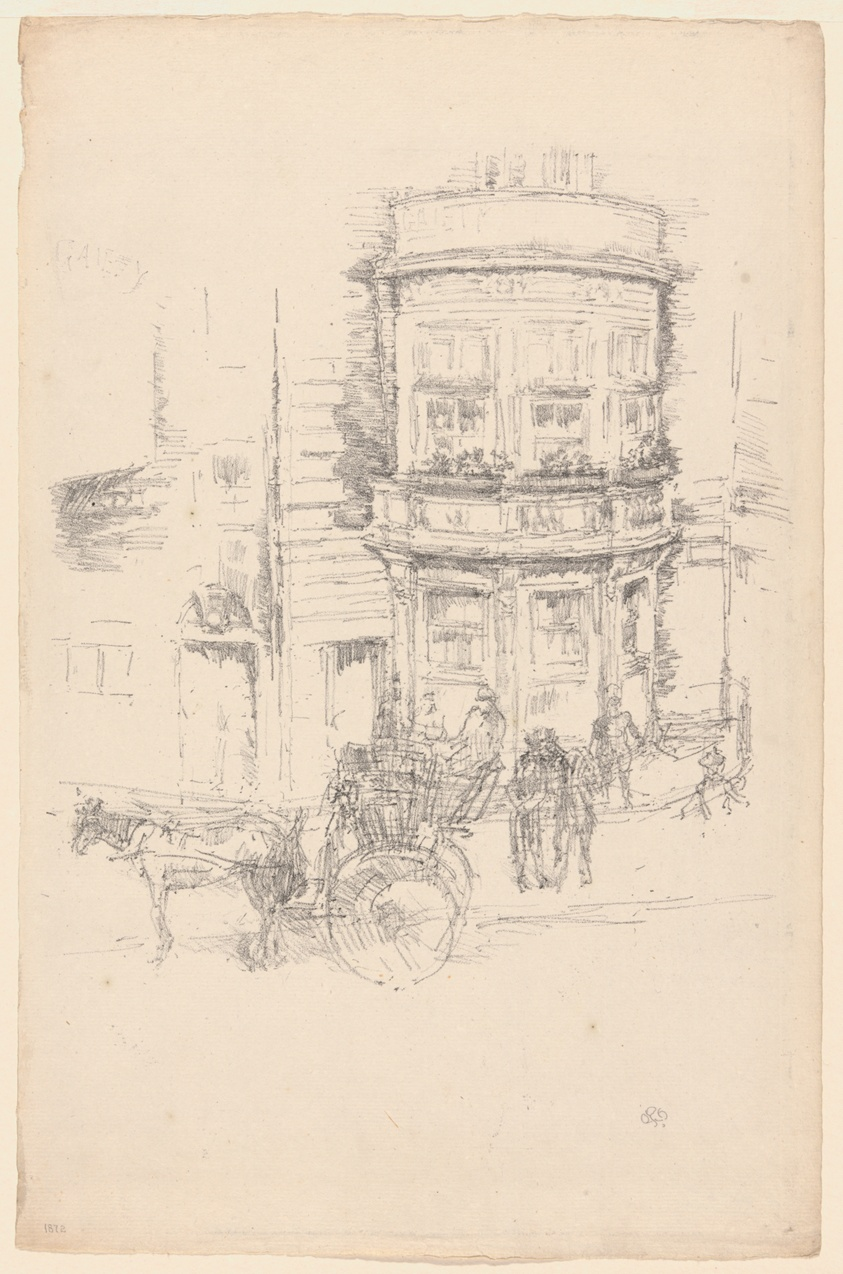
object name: Print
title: Back of the Gaiety Theatre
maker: James McNeill Whistler (American, 1834-1903)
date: 1895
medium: Lithograph in black on ivory laid paper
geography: United States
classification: lithograph; print; prints and drawing; paper